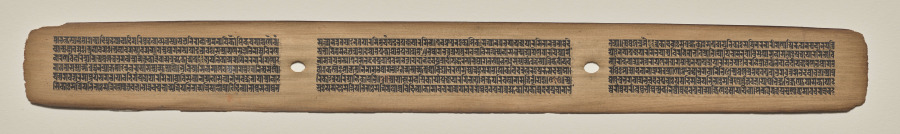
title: Text, Folio 17 (recto), from a Manuscript of the Perfection of Wisdom in Eight Thousand Lines (Ashtasahasrika Prajnaparamita-sutra)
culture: Eastern India, Bihar, Vikramashila Monastery. Painting: Nepal, Kathmandu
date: Sunday, September 14, 1119 (year 239 of the Newar Samvat in the month of Ashvina)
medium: gum tempera and ink on palm leaves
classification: Painting